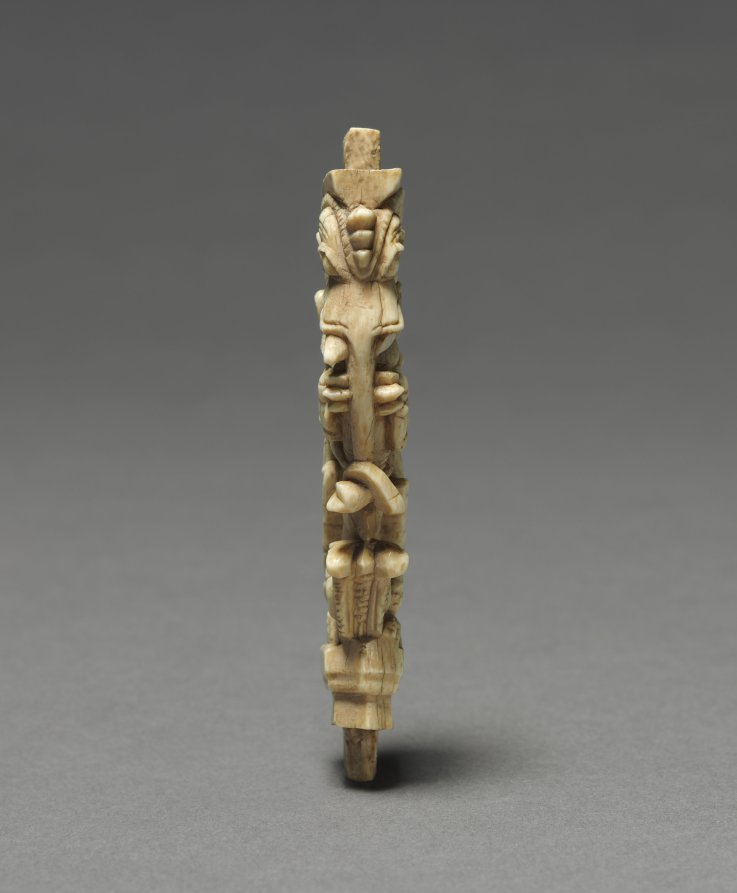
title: Carved Bracket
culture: South India, probably Madurai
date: 1600s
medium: Ivory with traces of pigment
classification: Ivory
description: Composite creatures with the body of a lion, tusks and trunk of an elephant, and horns of an antelope are standard elements of medieval Indian architecture and furniture. Traces of pigment indicate that this work was once brightly colored.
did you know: Ivory was most often harvested from a recently deceased elephant.